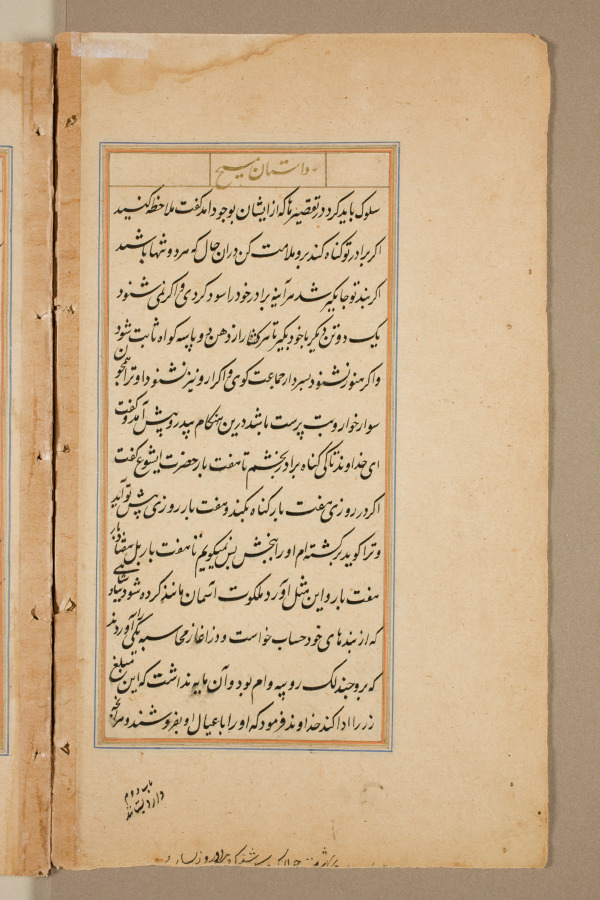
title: Text page from a Mirror of Holiness (Mir’at al-quds) of Father Jerome Xavier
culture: Mughal India, Allahabad, made for Prince Salim (1569–1627)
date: 1602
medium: Ink and gold on paper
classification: Manuscript